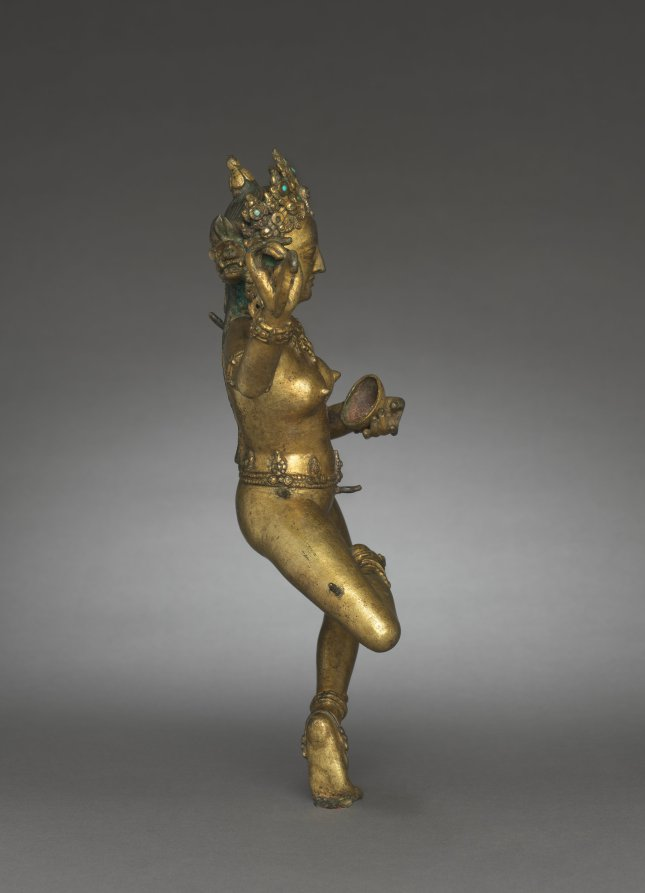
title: Vajravarahi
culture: Tibet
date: 1300s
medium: gilt bronze with turquoise inlay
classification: Sculpture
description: Vajravarahi is the tantric Buddhist counterpart to the Hindu mother goddess Varahi, identifiable by the boar head emerging above her right ear. She is a female enlightened being who emanated from the Buddhist Goddess of Perfect Wisdom. Enlightened beings transcend gender distinctions, and they can emanate as either male or female. The lithe figure dances while carrying a skull cup in her left hand. Raised up in her right hand is a ritual flaying knife with a handle in the shape of a halfvajra, used for skinning the metaphorical beast of uncontrolled passions. The pegs cast into her lower body were for holding a bone skirt.